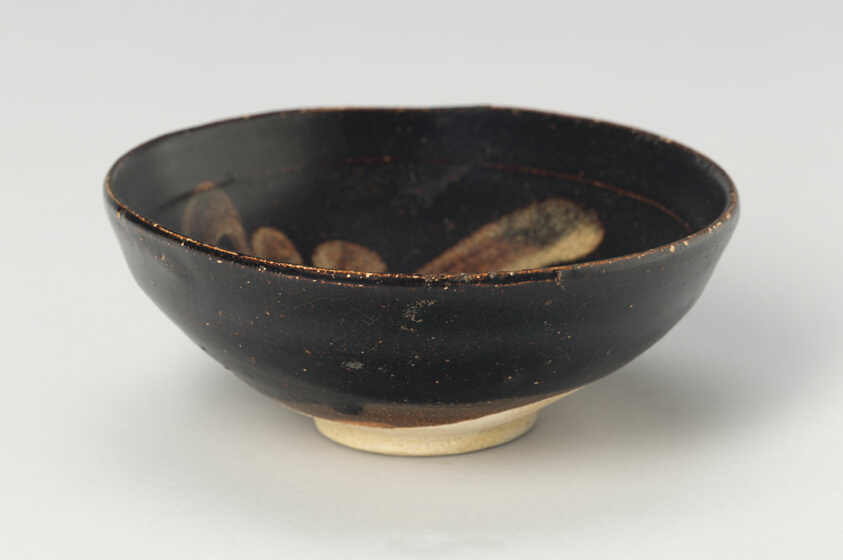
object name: Vessel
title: Bowl with Calligraphic Strokes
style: Chinese (culture or style)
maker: China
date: Southern Song (1127–1279) or Yuan dynasty (1271–1368), c. 12th/14th century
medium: Jizhou ware; light grey stoneware with dark brown glaze and painting in overglaze buff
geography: China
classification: bowl; dish (vessel); ceramics; vessel